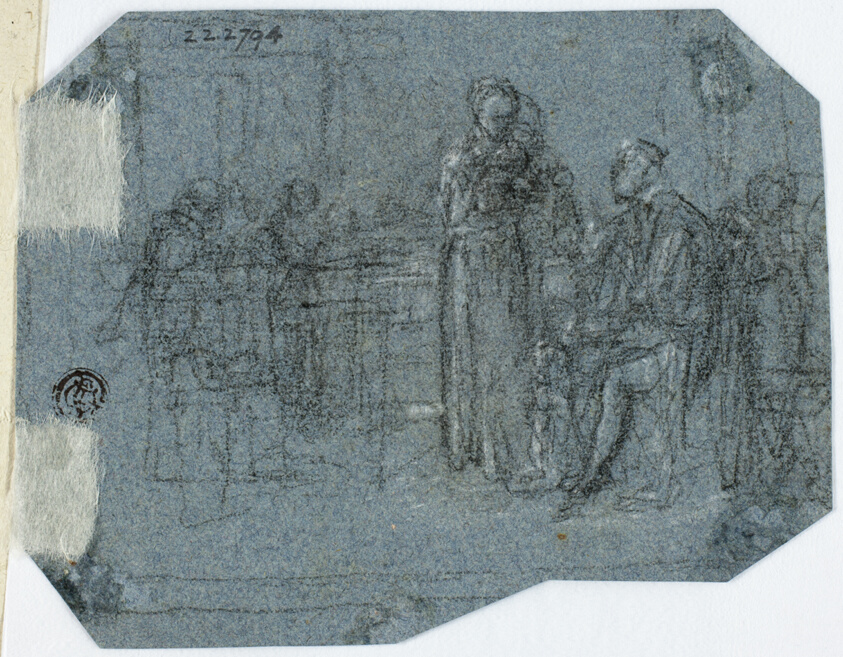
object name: Drawing and Watercolor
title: Sketches of Kitchen Utensils, Bent Arm (recto); Historical Scene (verso)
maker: Unknown Artist; British, 19th century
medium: Black chalk with stumping, heightened with traces of white chalk (recto and verso), on blue laid paper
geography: United Kingdom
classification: chalk; paper; drawings (visual works); prints and drawing